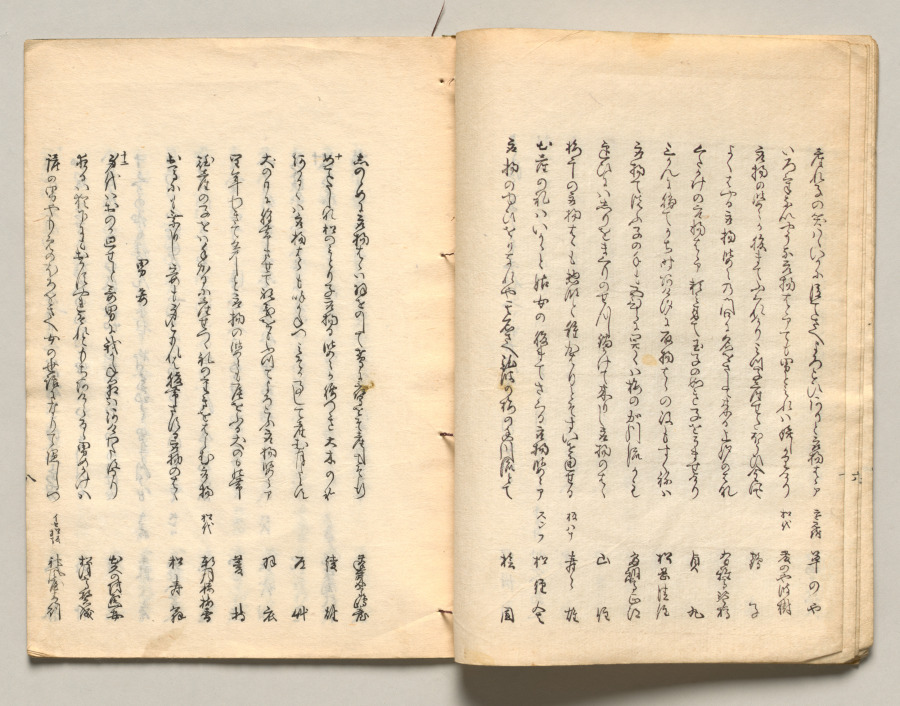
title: Spread Sixteen from Volume Four of People of Japan in Light Verse (Kyōka)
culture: Japan, Edo period (1615–1868)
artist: Utagawa Hiroshige (Japanese, 1797–1858)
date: 1857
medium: Woodblock-printed book; ink and color on paper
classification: Bound Volume